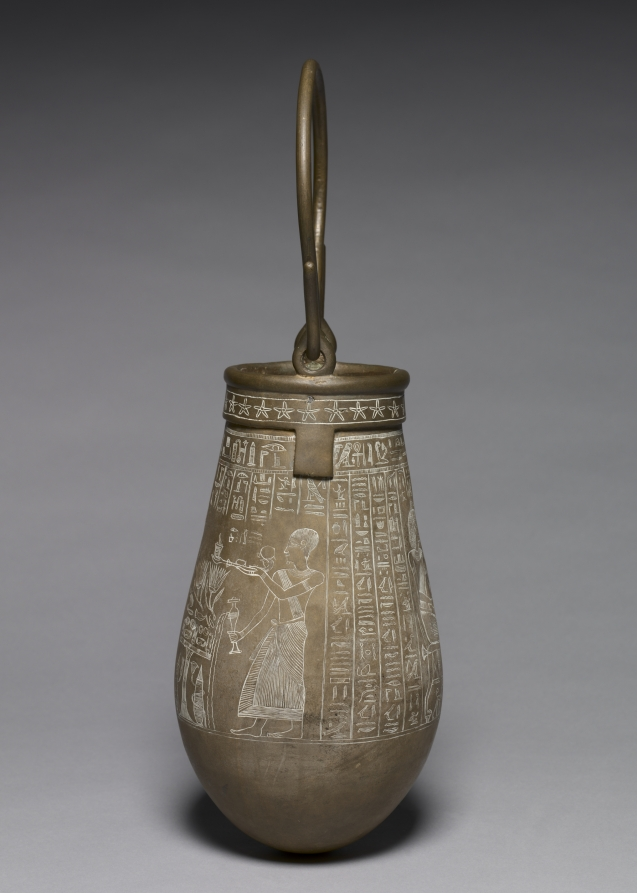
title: Decorated Situla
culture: Egypt, Greco-Roman period (332 BCE–395 CE), Ptolemaic dynasty (305–30 BCE)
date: 305–30 BCE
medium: bronze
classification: Vessels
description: The situla was a deluxe ritual vessel that played an important role in Egyptian religious ceremonies. The two scenes on this situla exemplify the dual roles of a pious Egyptian in the afterlife: receiving offerings from his family on the one hand and making offerings to the gods on the other. On one side of the vessel the deceased, Padiamennebnesuttawy ("He who Amen, lord of Karnak, gives"), sits in a low chair accompanied by his pet dog. The vertical, cross-shaped sign preceding the animal is his name, Nefer, meaning "good one" or "beautiful one." On the right, the deceased's eldest son, Amenhotep, makes offerings of incense and water to his father. On the other side the deceased demonstrates his piety by making an offering of round loaves of bread, vegetables, and meat to the gods. Opposite him are the gods who are the recipients of his offerings—Osiris, god of the dead; Horus, son of Isis; and Isis herself—each of whom wears elaborate beaded and feathered garments.